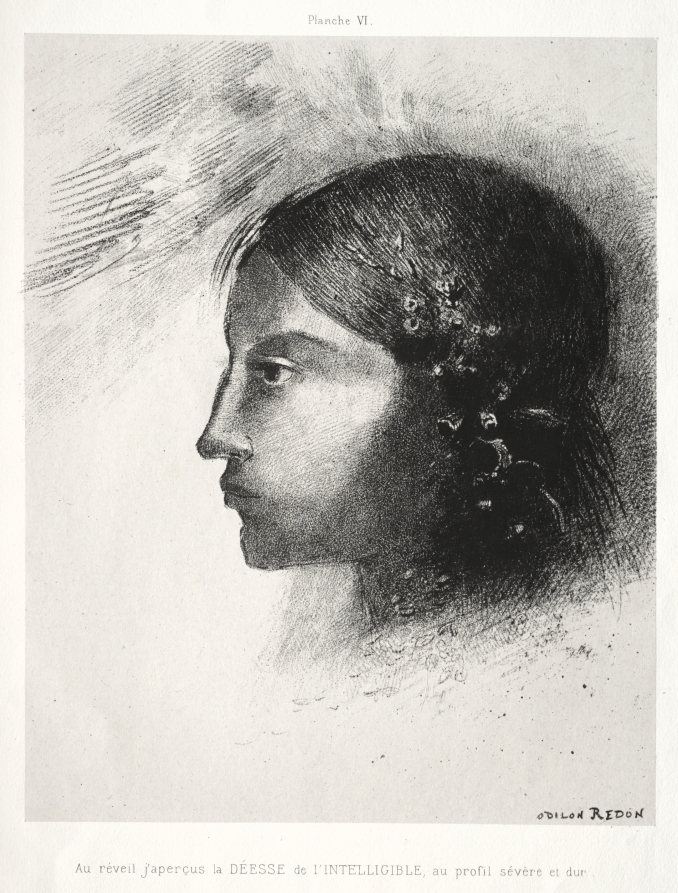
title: Upon Awakening I Saw the Goddess of the Intelligible with Her Severe and Hard Profile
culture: France, 19th century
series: Homage to Goya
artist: Odilon Redon (French, 1840–1916)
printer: Lemercier & Cie.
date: 1885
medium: lithograph on China paper laid on wove paper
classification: Print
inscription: printed above image at center: Planche VI.; below image at center: Au réveil j'aperçu la DÉESSE de l'INTELLIGIBLE AU PROFIL SÉVÈRE ET DUR.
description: This series is one of many that Odilon Redon created throughout his career. Nearly two-thirds of his lithographs took the form of portfolios—prints connected conceptually by a theme or narrative and physically by a folder or binding. Such works were often dispersed over time, but Cleveland was fortunate to acquire several complete sets with their original covers during the 1920s. Dating from Redon’s early experimentation with lithography, Homage to Goya was intended as a tribute to 18th-century Spanish master Francisco de Goya, whose interest in dreams and the subconscious influenced Redon. The six seemingly unrelated images celebrate Goya’s ambiguity and collectively suggest the introspection and isolation of artistic practice.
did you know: This portfolio was published in an edition of 50, one of which Redon sent to poet Stéphane Mallarmé soon after Redon became a frequent participant in a literary salon held regularly at Mallarmé's home.